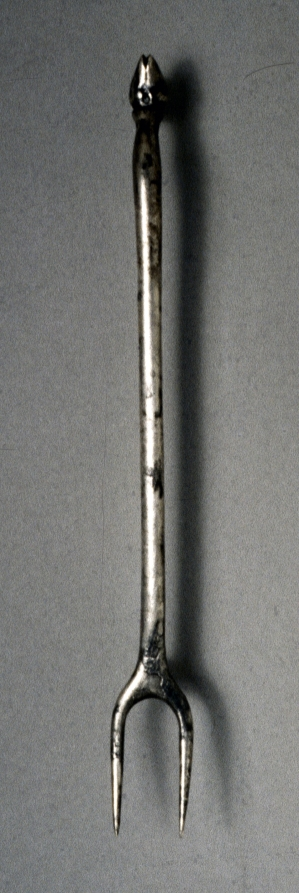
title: Fork with Animal Hoof Finial (Ornament)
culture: Byzantium, Syria(?), Byzantine period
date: 300s CE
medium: silver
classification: Metalwork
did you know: In the 10th century, forks like this one were common in Byzantium. During this same period in Western Europe, people usually ate with their fingers, thinking that forks were decadent.